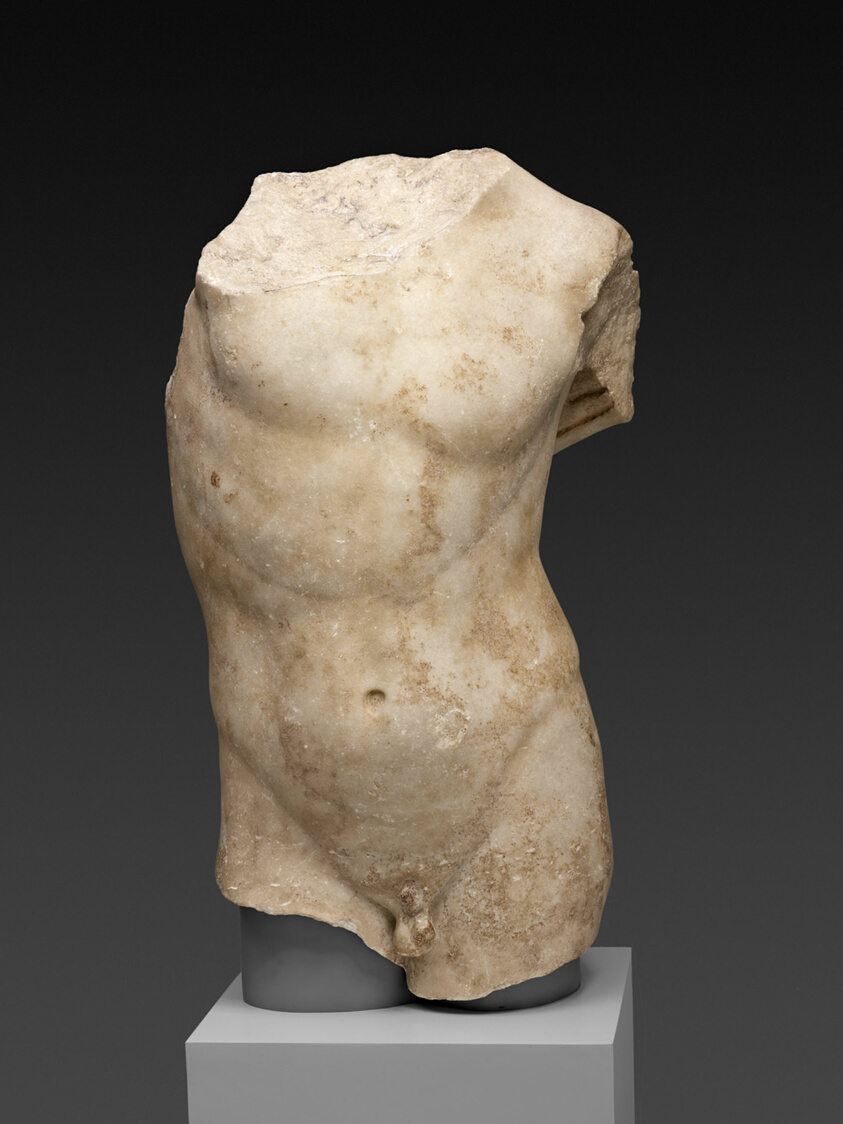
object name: Sculpture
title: Torso of a Youth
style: Classical, hellenistic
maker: Roman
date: 1st-2nd century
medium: Marble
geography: Roman Empire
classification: sculpture; marble; stone; ancient art